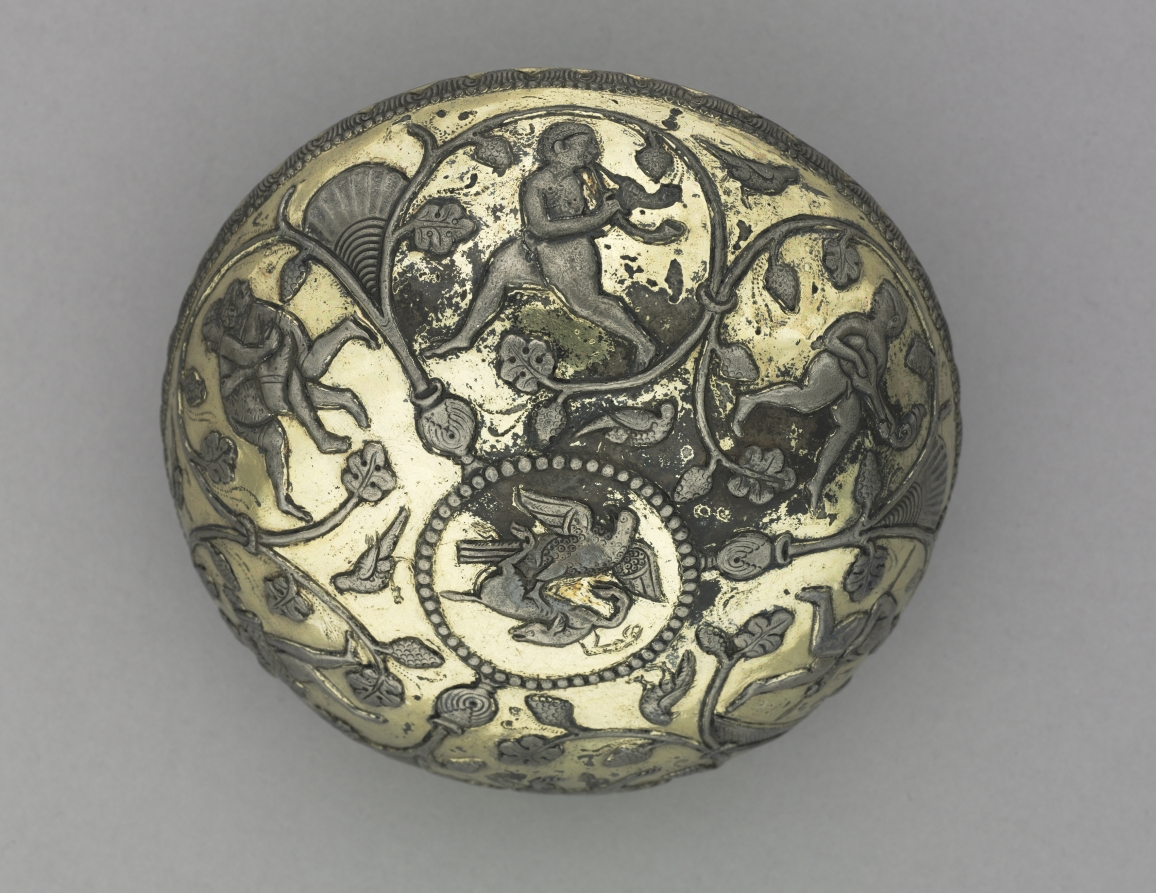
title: Bowl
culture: Iran, Sasanian Empire (224–651 CE)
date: 500–700 CE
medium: silver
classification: Metalwork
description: Every good Zoroastrian was supposed to spend one-third of his day farming; one-third philosophizing; and one-third eating, resting, and at pleasure. The abundance of Sasanian luxury goods is evidence of the importance accorded the last third of the day.